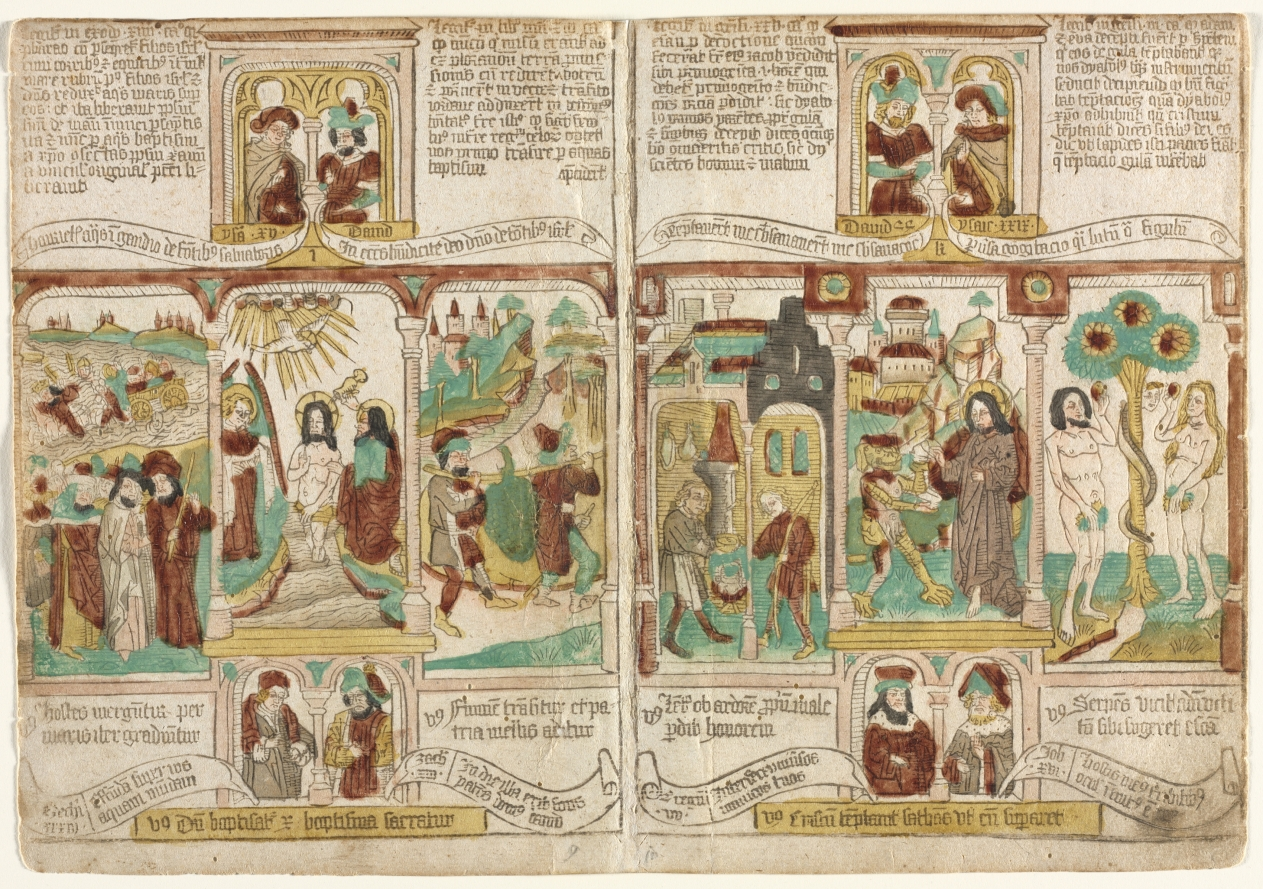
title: The Bible of the Poor (Biblia Pauperum), Pharaoh's Army Drowned in the Red Sea; Baptism of Christ; and Moses' Spies Returning with Grapes from Canaan Esau Selling Jacob his Birthright; Temptation of Christ; and Temptation of Adam and Eve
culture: Germany or the Netherlands, 15th century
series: Biblia Pauperum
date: c. 1465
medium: woodcut, hand colored with watercolor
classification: Print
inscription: text, in block: [see object file]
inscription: lower center, in graphite: 9 10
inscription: verso, lower left, in graphite: 61083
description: This hand-colored leaf is from the blockbook Biblia Pauperum (Bible of the Poor), which served as an educational handbook for laymen and clerics. Blockbooks, in which images and text were carved in relief from a single block of wood, are the earliest form of printed text in Europe. On each page, two Old Testament episodes flank a New Testament scene, implying a connection between the stories. At left is Christ’s baptism between the Pharaoh’s drowned army and spies returning from Canaan. To the right is Christ’s temptation bordered by Esau selling his birthright to Jacob and the temptation of Adam and Eve.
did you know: This sheet was hand-colored with a limited palette, so that black, for example, plays dual roles of the color of hair, and the shadow on a building.